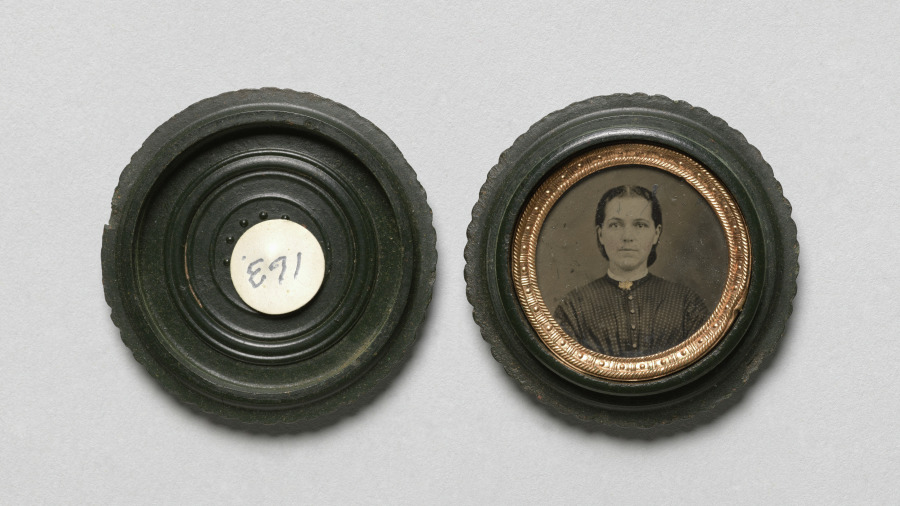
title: Portrait of a Young Woman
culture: America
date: c. 1855–60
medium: Tintype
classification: Photograph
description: It seemed a miracle that anyone could afford to have an accurate record of their own likeness or those of their loved ones. This portrait is an excellent example of the hundreds of thousands of portraits produced by commercial photographers in mid-nineteenth-century America. Small scale yet housed in an elaborately decorated thermoplastic case, it was intended to be carried by its owner or displayed on parlor tables or knickknack shelves.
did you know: During the first decades of photography, portraits far outnumbered every other type of image.